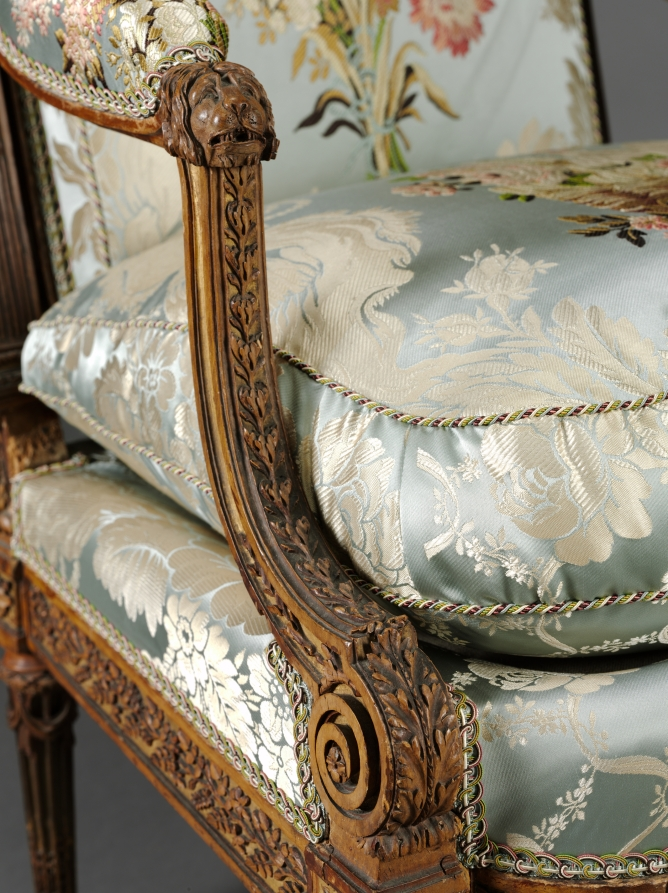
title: Armchair (Fauteuil) (1 of 2)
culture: France, 18th century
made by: Nicolas-Denis Delaisement (French)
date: c. 1785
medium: boxwood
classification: Furniture and woodwork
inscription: signed on back of frame of seat underneath: Delaisement with inverted "s."